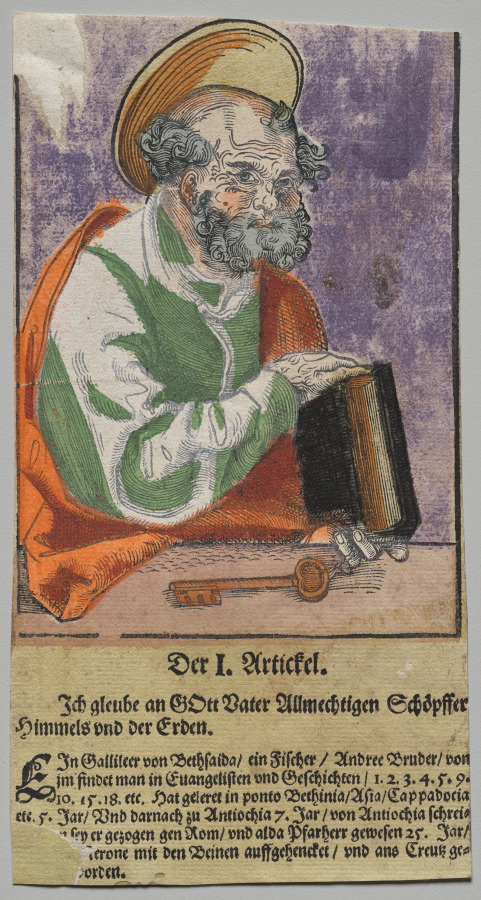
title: Peter from Christ, the Apostles, and Saint Paul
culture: Germany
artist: Lucas Cranach the Elder, After (German, 1472–1553)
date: 1563/64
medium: Woodcut with letterpress text, hand colored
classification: Print